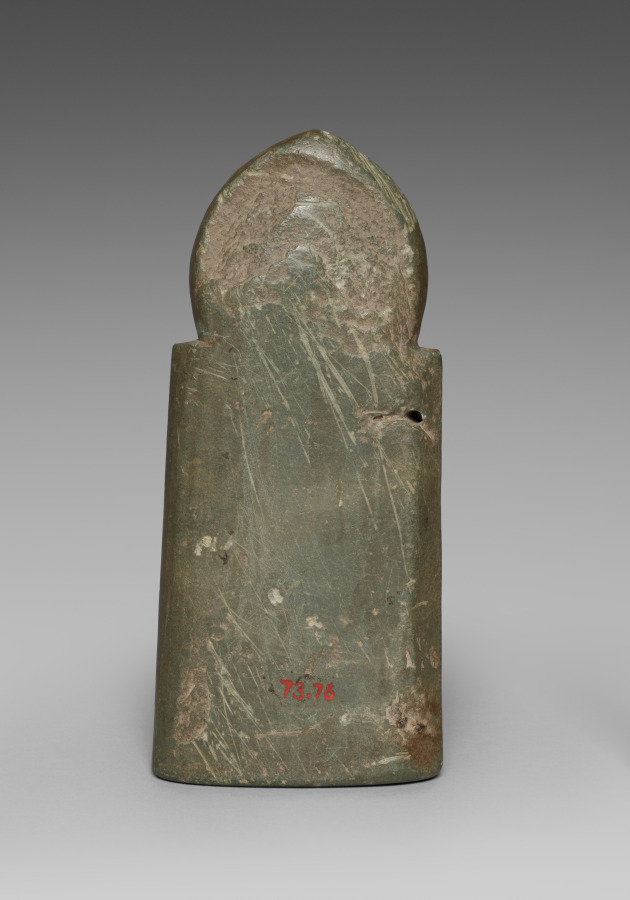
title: Section from a Portable Shrine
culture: Pakistan, Gandhara, Kushan period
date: 100s CE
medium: gray schist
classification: Sculpture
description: Figures of deities who protect children are featured in this relief carving. A form of Skanda holding a bird and a flower stands next to a regal yakshi with pointed rodent or elephant ears. A diminutive figure who may be a child is shown kneeling at his feet. Above, the six-headed mother goddess Shashthi sits next to Skanda, holding the spear.